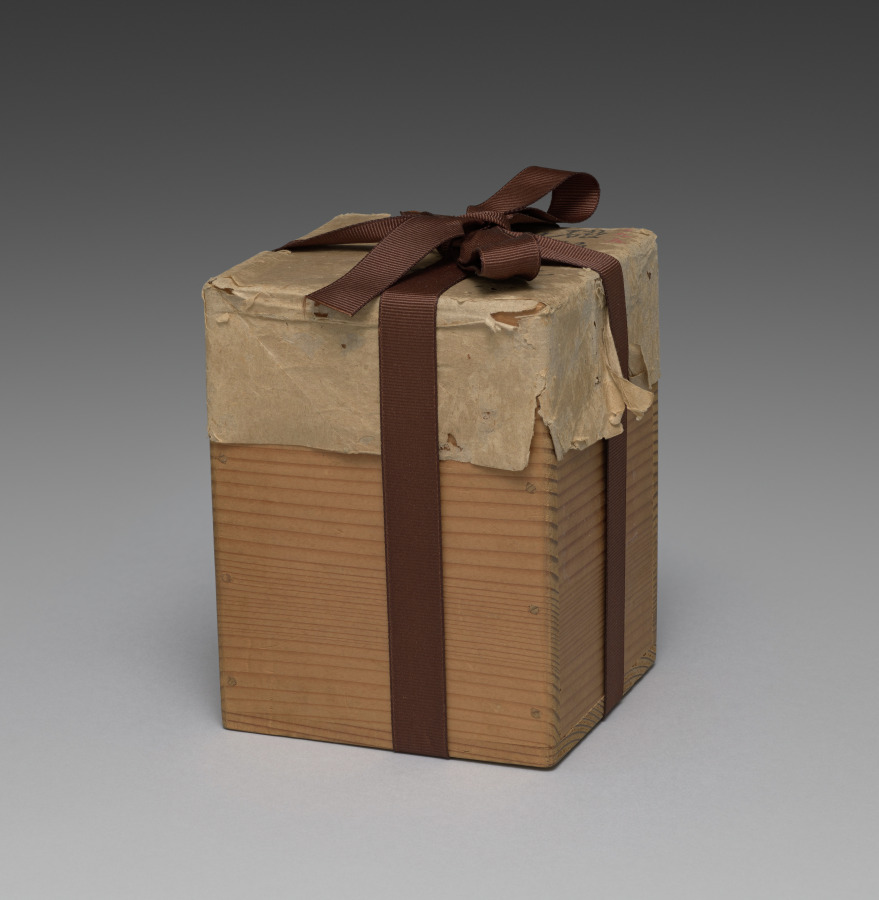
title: Teabowls with Peony and Crabapple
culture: Japan, Meiji period (1868–1912)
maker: Seifū Yohei III (Japanese, 1851–1914)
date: 1893–1914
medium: Set of five teabowls; porcelain with underglaze and overglaze color enamels and gold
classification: Ceramic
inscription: 清風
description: Overglaze color enamels are generally called iro-e (literally “color picture”) in the terminology customarily used for porcelain decoration of the Edo period. This set of teabowls is a fine example of Yohei III’s skilled use of the technique, which is identified on this set’s box lid with the alternate phrasing “porcelain with color painting” (jisaiga). Distinct from the way overglaze colors were used in Kakiemon ware from Arita, his designs and applications show a consciousness of porcelain decoration of the Qing dynasty. Here, he combines Chinese models with a sensibility taken from Kyoto ware precedents, including painting with powdered gold (kinrande). The colors used in the bowls are as follows: blue, black, gold, white, light green, green, and pink. The blue appears only inside the footring, as a double band of underglaze color. The black iron, used for stems and leaf veins, is painted over the glaze. The gold, also painted over the glaze, is used for leaves and the centers of flowers, for solid, glossy lines defining detail, or as a semimatte ground. The white of the peony flower is built up to a low relief over the glaze. Yohei has incised lines of varying widths into the pigment, carving away to the bowl’s surface, to differentiate individual petals and their rippled shapes. The light and dark greens, as well as the pink, are painted over the glaze. Of note is how Yohei has first used thinly applied lines of light green to draw the plum branch before applying the opaque iron black. For the plum buds and flowers, he has used a diluted pink with an opaque pink for outline, both over the glaze. In his later works, Yohei used pink both over and under the glaze in a manner similar to underglaze blue, and it can be challenging in some cases to discern which technique he has used. A lidded container in a private collection has a similar design but is augmented with the inclusion of white and purple magnolia blossoms. In contemplating the original decorative program of a set, of which these teabowls may have been a part, it is worth considering that perhaps not all objects included the full range of motifs. In such cases, the composition of the individual object may be best understood within the context of the extended ensemble. Here, the delicate pink plum on one side of the bowl seems slightly unbalanced with the bold white peony on the other, but when seen with other objects with the magnolia and its additional colors and shapes, it is possible to imagine a set with a complex, balanced design across multiple pieces.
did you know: These five teabowls were likely from a larger set of teaware.